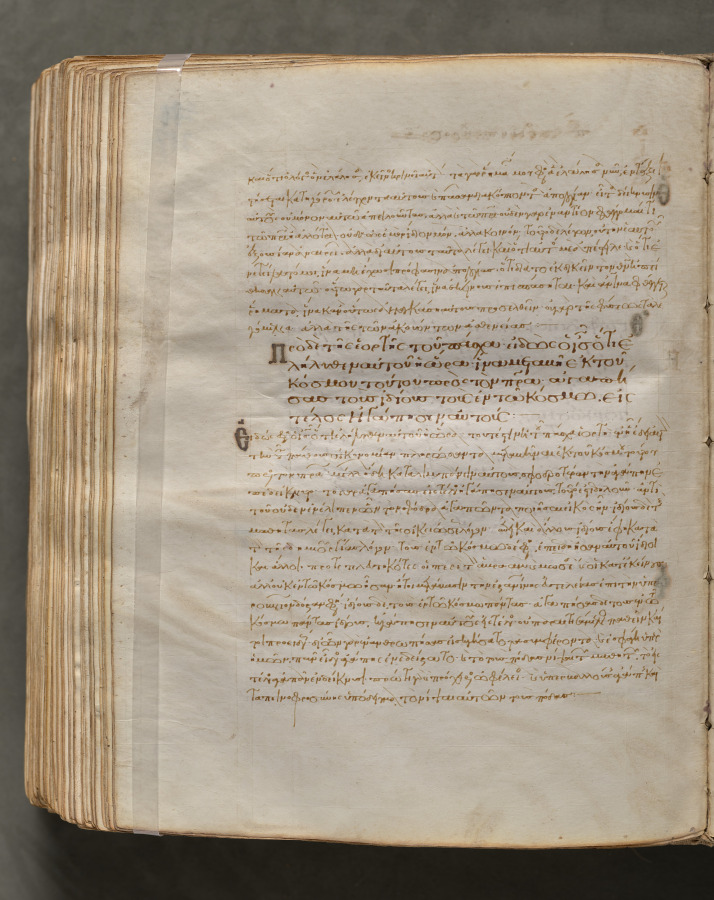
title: Text, folio 387 (verso), from a Gospel Book with Commentaries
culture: Byzantium, Constantinople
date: c. 1000–1100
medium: ink, tempera, and gold on vellum; leather binding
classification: Bound Volume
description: Each of the four gospels in this book opens on a page with brilliantly illuminated borders depicting the author of the text as well as birds—principally peacocks, symbols of the immortality of the soul—and fountains, representing the fountain of life and the salvation of the soul. This volume consists of 428 leaves with texts in Greek. Its level of sophistication suggests that it was probably written and decorated in a monastery in Constantinople.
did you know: Gospel books were carried in procession through Byzantine churches.